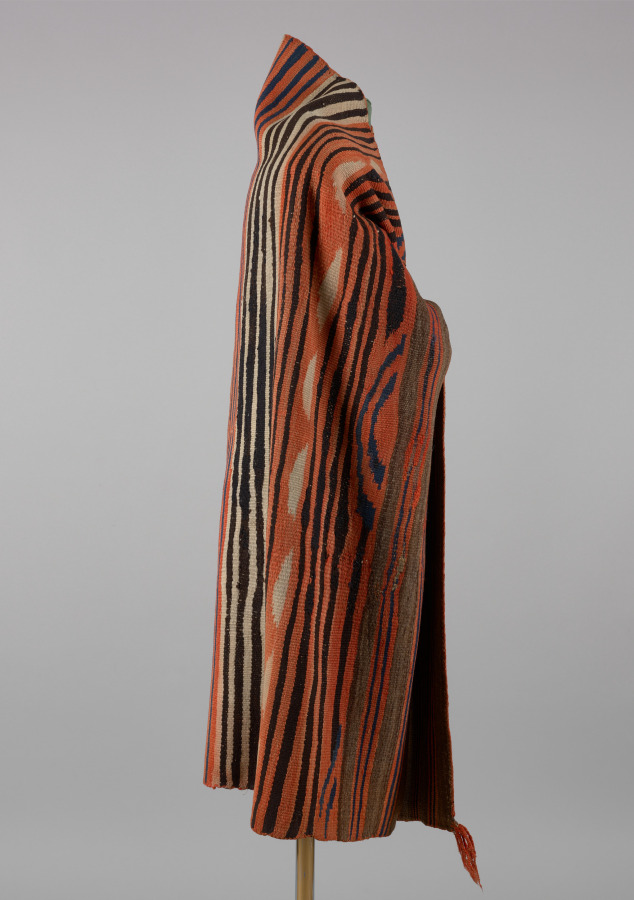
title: Banded Wearing Blanket (Diyugi)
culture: America, Native North American, Southwest, Diné (Navajo) or Zuni Pueblo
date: c. 1880–90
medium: Wool (handspun and bayeta): tapestry weave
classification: Textile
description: This blanket was created during the late 1800s, when weavers in the Southwest began to shift from making garments for Indigenous use, including trade, to additionally create items for non-Native collectors. In this new market, traditional wearing blankets, which were worn around the shoulders, were marketed as rugs.